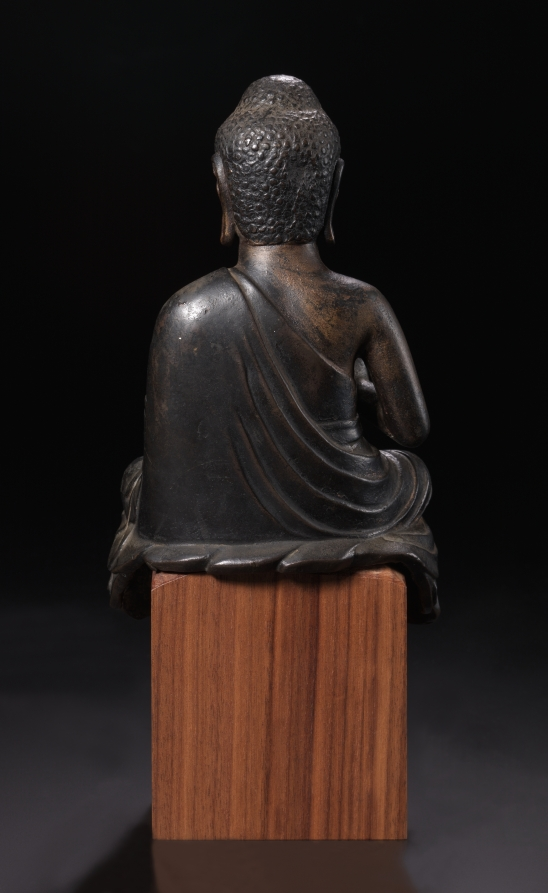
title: A Preaching Buddha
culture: Japan, Nara period (710–94)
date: 700s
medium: bronze with traces of gilt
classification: Sculpture